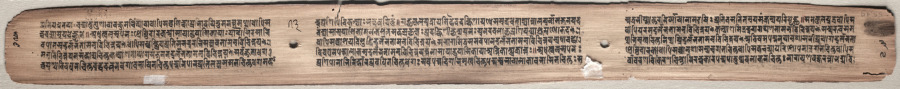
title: Text, folio 73 (verso) from a Gandavyuha-sutra (Scripture of the Supreme Array)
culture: Nepal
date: 1000–1100s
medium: ink on palm leaf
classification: Painting